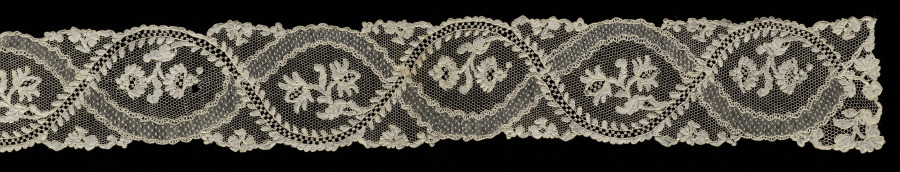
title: Lace Lappet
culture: France, Argentan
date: 1715–74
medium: Linen: needle lace (Point de Argentan)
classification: Lace